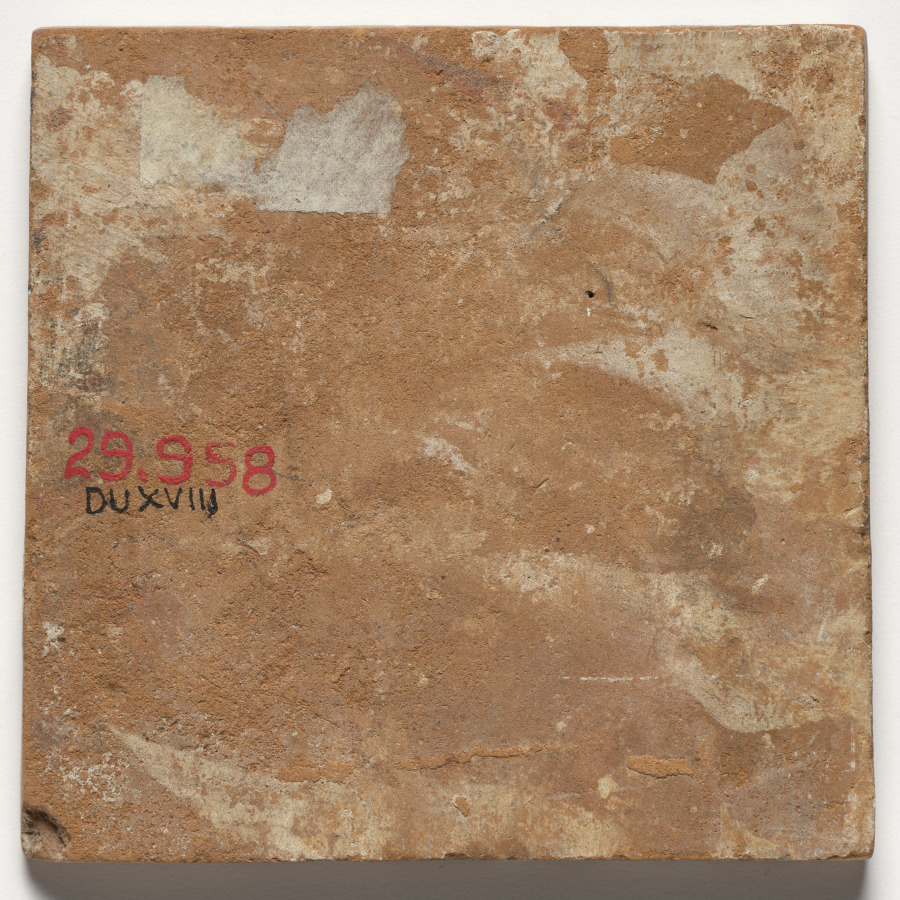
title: Tile- Diamond Interlace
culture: Netherlands, Holland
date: c. 1700s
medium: glazed ceramic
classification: Ceramic